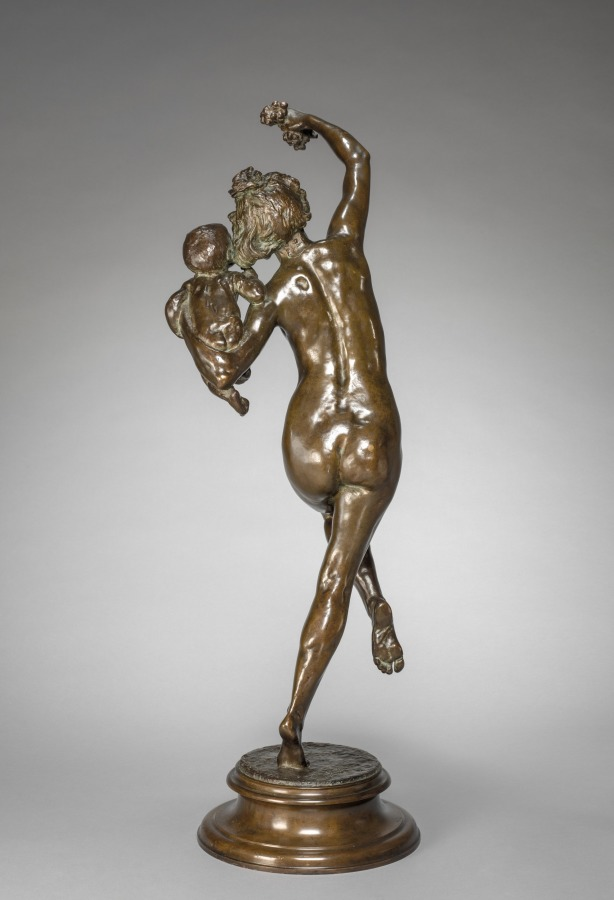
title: Bacchante and Infant Faun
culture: America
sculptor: Frederick William MacMonnies (American, 1863–1937)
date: 1894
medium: bronze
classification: Sculpture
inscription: Signed on base: F. Macmonnies, 1894.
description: This sculpture is a smaller version of a three-quarter life-size bronze given by the artist to Charles McKim, the architect for the Boston Public Library who placed the statue in the fountain of the library's courtyard. Although the vast majority of Bostonians supported the statue, a small but powerful group denounced it as "debauched," "vice-ridden," and "treason to purity and sobriety and virtue, and Almighty God." The opponents included the Boston Brahmins—a group of Anglo-Saxon, Protestant elite—and various religious, temperance, and antivice organizations. Feeling threatened by the swell of immigrants and by the changing roles of women, these groups hoped that the library would offer an alternative to the saloons frequented by Boston's lower classes. But a statue of a nude woman reveling under the effects of wine from the Roman god Bacchus only devalued this bastion of civilization. Consequently, the Boston Art Commission rejected the statue in 1897. However, in 1992 Boston's Art and Humanities commissioner and the library trustees returned a version of the original to the courtyard without public protest.